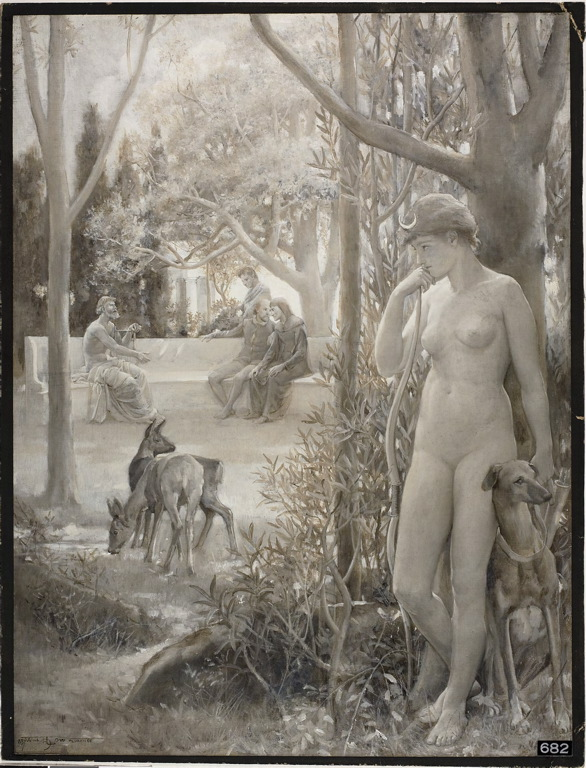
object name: Painting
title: Ode: "Bards of passion and of mirth"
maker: Will Hicock Low (American, 1853-1932)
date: 1887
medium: Oil on canvas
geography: United States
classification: drawings (visual works); prints and drawing; painting